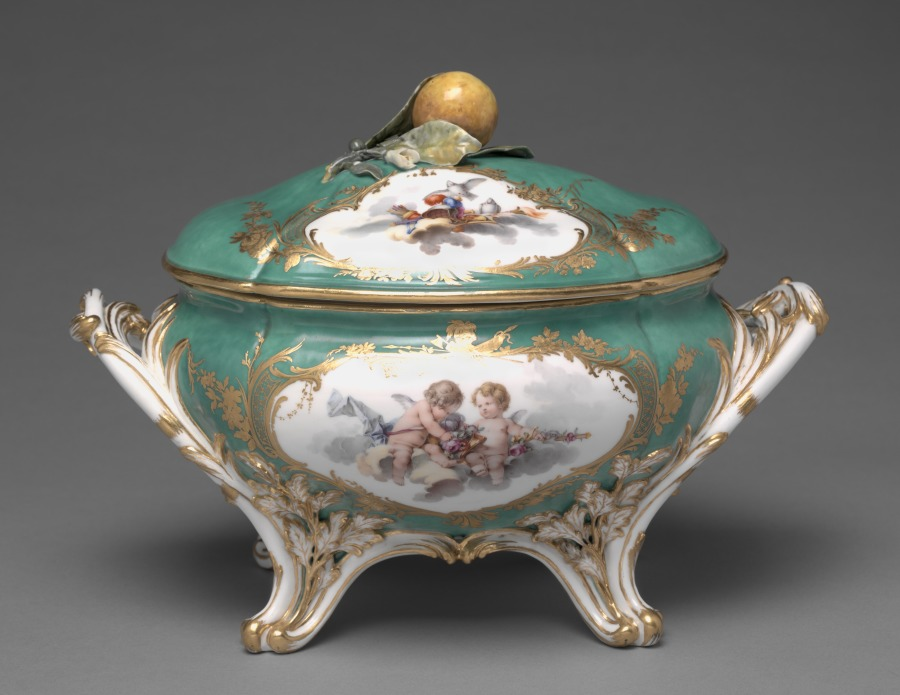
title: Covered Tureen (Terrine du roi)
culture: France, Sèvres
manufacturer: Sèvres Porcelain Factory (French, est. 1756)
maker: attributed to Charles Nicolas Dodin (French, 1734–1803)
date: 1756–57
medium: soft-paste porcelain with enamel and gilt decoration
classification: Ceramic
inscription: [Interlaced L's]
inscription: [Date letter 'D' (in cursive with a dot on either side)]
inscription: [Incised 'b']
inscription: [Incised '6']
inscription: [Inventory numbers in red enamel]: "r.u./710" [base of tureen]; "r.u./710a" [on lid]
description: This tureen’s striking green background, or fond vert, was a major advancement for the Sèvres Porcelain Factory, known for their innovation in and mastery of color. Traditionally the largest, most expensive item in an 18th-century French dinner service, this tureen was part of a porcelain dining set presented to King Frederick V of Denmark by French King Louis XV in 1758.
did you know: French King Louis XV was a great patron of the decorative arts; he acquired the Sèvres Porcelain Factory in 1759.